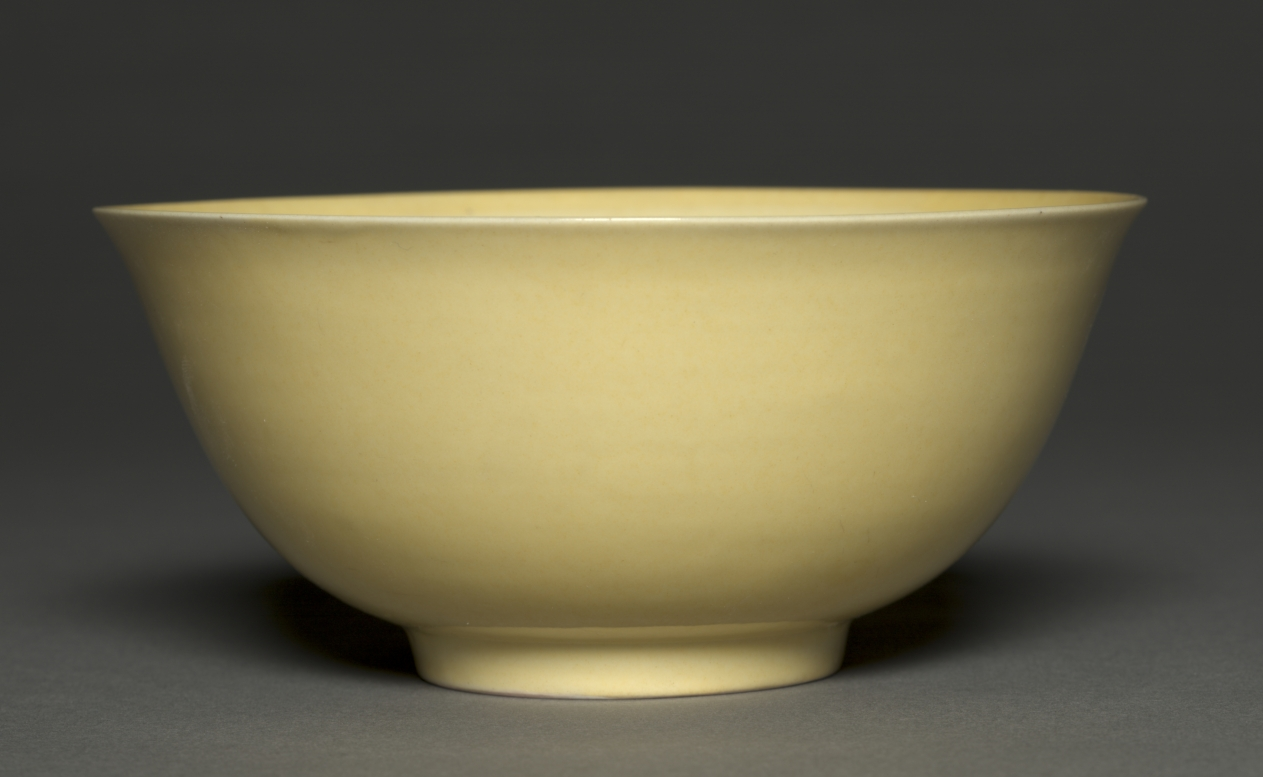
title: Bowl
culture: China, Jiangxi province, Jingdezhen, Ming dynasty (1368–1644), Hongzhi mark and period (1488–1505)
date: 1488–1505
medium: porcelain with yellow glaze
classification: Ceramic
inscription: 大明弘治年制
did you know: The six-character inscription on the base reveals this deep bowl was made during the reign of the Hongzhi emperor.